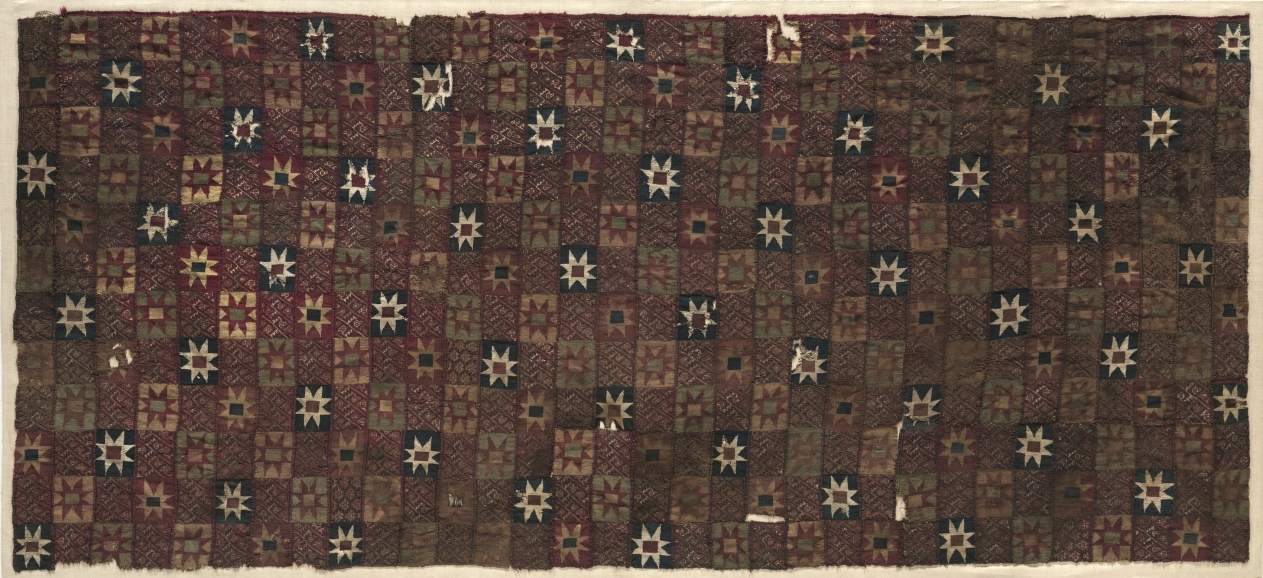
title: Fragmentary Mantle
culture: Peru, South Coast, Ica Valley ?, Inca Culture, 15th-16th century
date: c. 1400–1532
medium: tapestry and fancy twill, brocaded; twill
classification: Textile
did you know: Eight-pointed stars are a typical motif for the provincial Inka style of the south coast.